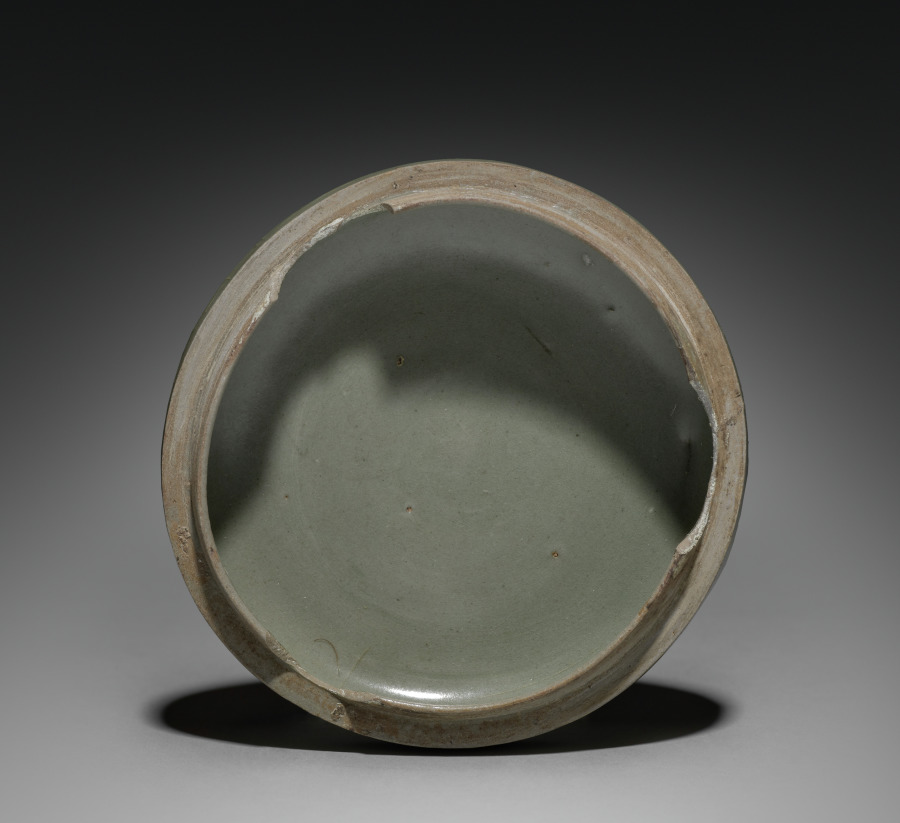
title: Box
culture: Korea, Goryeo dynasty (918–1392)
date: 918–1392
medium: pottery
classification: Ceramic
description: Celadons, spoons, seals, and bronze mirrors were the most common burial objects in tombs during the Goryeo period (918–1392). Once used to contain colored powder, rouge, and eyebrow gel for makeup, this small container was one of the standard goods that furnished tombs of the elites. Both women and men used the grain powder of rice or millet for whitening their skin, safflower extract for rouge, and plant ash or soot for eyebrow gel. Yet, natural-looking makeup seems to have been the most favorable one in Korea according to the travelogue by Xu Jing (1091–1153), the Chinese diplomat who visited Korea in 1123.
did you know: This ceramic container was used to store either incense or cosmetics.